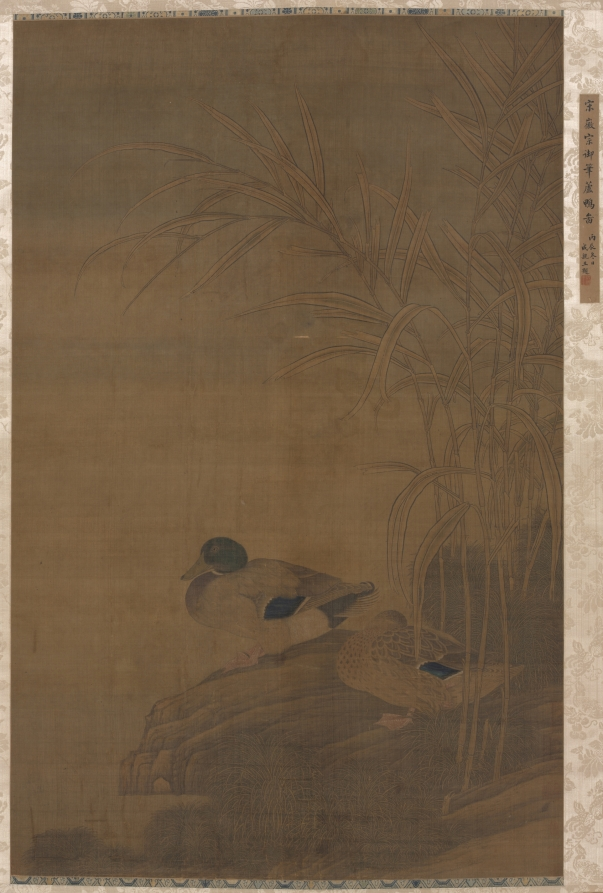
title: Ducks under Reeds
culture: China, Ming dynasty (1368–1644)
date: 1400s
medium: hanging scroll, ink and color on silk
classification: Painting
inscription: 1 label on mounting, dated 1796, by Yong Xing 永瑆 (Prince Cheng 成亲王, 1752-1823)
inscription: 7 seals: 1 of Song Luo 宋犖 (1634-1713); 1 of Gong Erduo 宮爾鐸 (b. 1838); 5 unidentified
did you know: The artist realistically represented that the Mandarin duck is a sexually dimorphic species, meaning males and females differ in appearance.